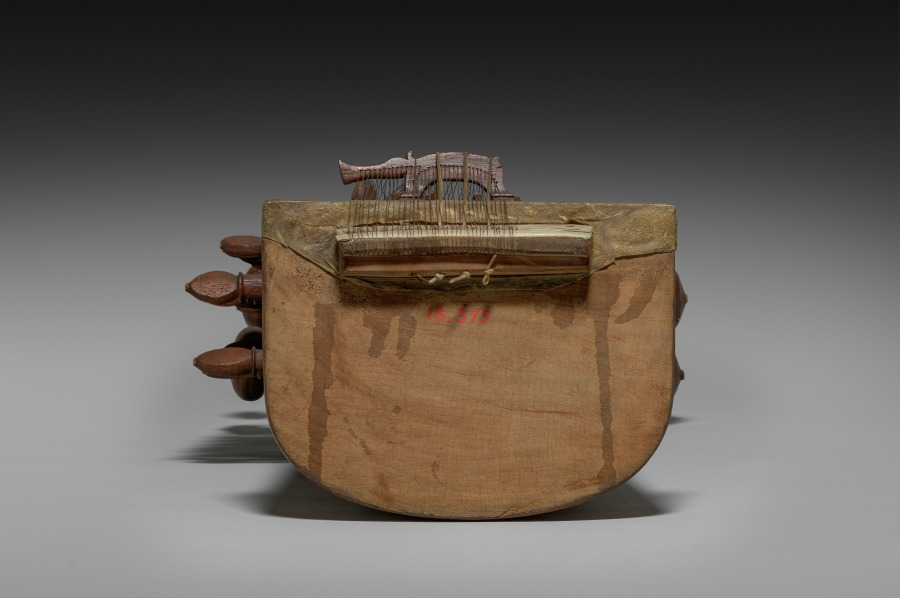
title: Sarangi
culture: India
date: 1800s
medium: Wood, parchment, bone or ivory, wood inlays, gut, and copper strings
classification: Musical Instrument